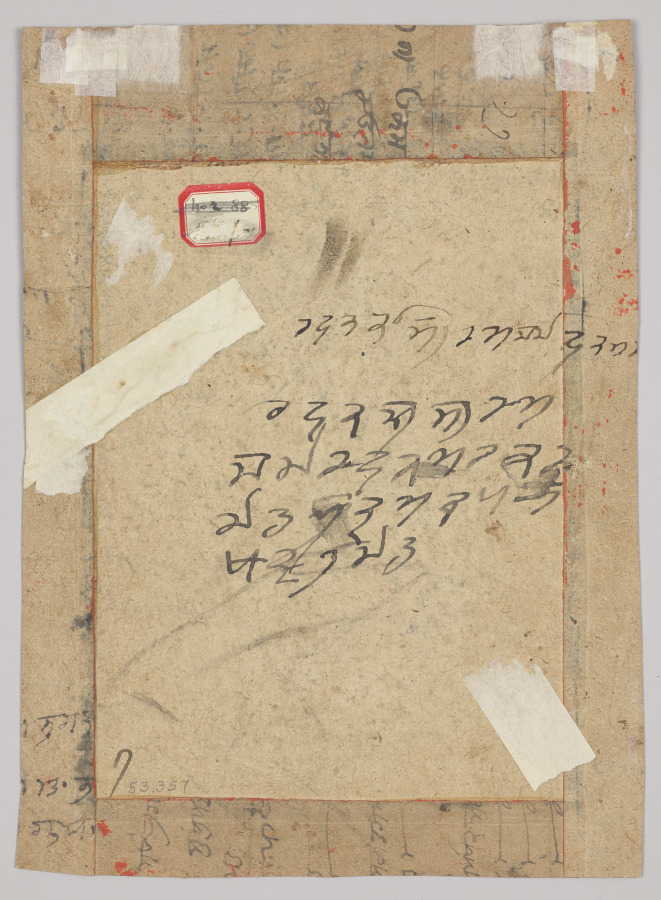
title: Rama and Lakshmana Fighting Ravana, from a Dashavatara (Ten Incarnations [of Vishnu]) series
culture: Northern India, Pahari Region, Himachal Pradesh, Rajput Kingdom of Chamba, Court of Raj Singh (reigned 1764–94)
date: c. 1765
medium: Gum tempera and gold on paper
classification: Painting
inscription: [[top border, in Takri]] sri raja ram lachhamana avatara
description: Against the dark green and foreboding landscape, the final and much-anticipated battle between the demon king Ravana and the mighty princes Rama and Lakshmana unfolds. Ravana wields twenty weapons, including a poisonous snake in his front left hand. The blue Rama aims an enchanted crescent-shaped arrow at bees emitted from the donkey head at the apex of Ravana’s ten crowns. The arrow and bees stand for powerful mantras, or magical incantations, that can destroy one’s enemies. The impending defeat of Ravana will fulfill the purpose of Vishnu’s incarnation as Rama.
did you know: Rama and Lakshmana wield divine bows in their fight against the ten-headed demon Ravana.